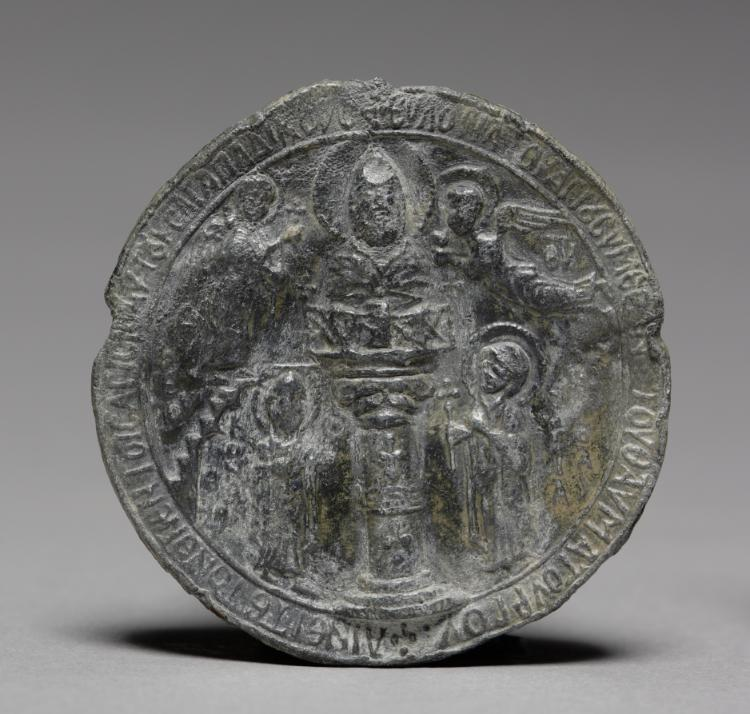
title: Pilgrim's Medallion with Saint Symeon the Younger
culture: Byzantium, Syria, Byzantine period, early 12th Century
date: c. 1100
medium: lead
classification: Metalwork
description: Saint Symeon the Younger was a stylite saint, an early Christian ascetic who fled the world for the desert and, perched on a column, spent his days fasting and praying. The site of Symeon’s column attracted many pilgrims during and after his lifetime. Medallions like this one, showing Symeon atop his column, were taken home by pilgrims in commemoration of their visit and were believed to serve their owners as protective talismans.